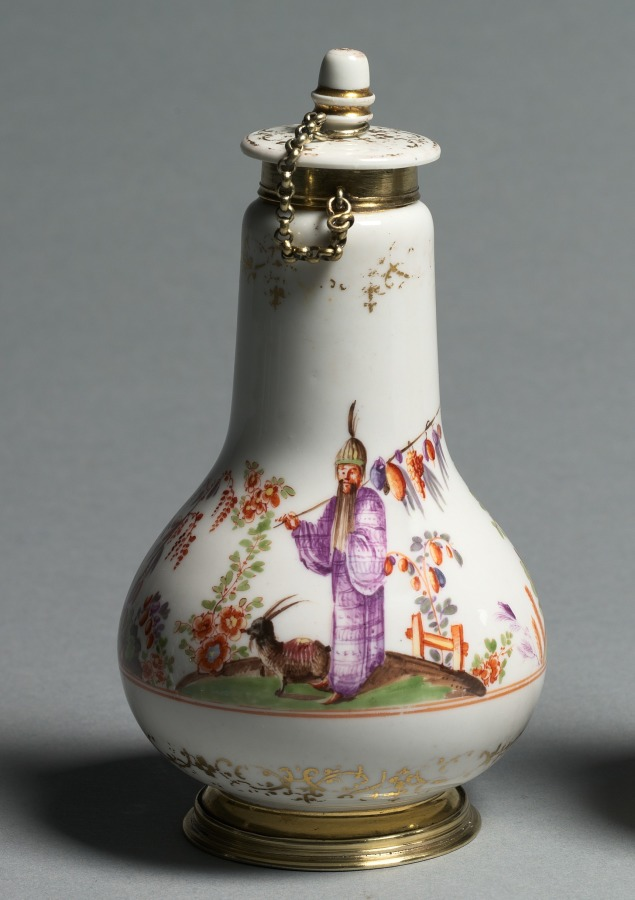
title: Covered Flask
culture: Germany, Meissen, 18th century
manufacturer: Meissen Porcelain Factory (German, est. c. 1710)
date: c. 1720–1723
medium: porcelain with gilt metal mounts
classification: Ceramic